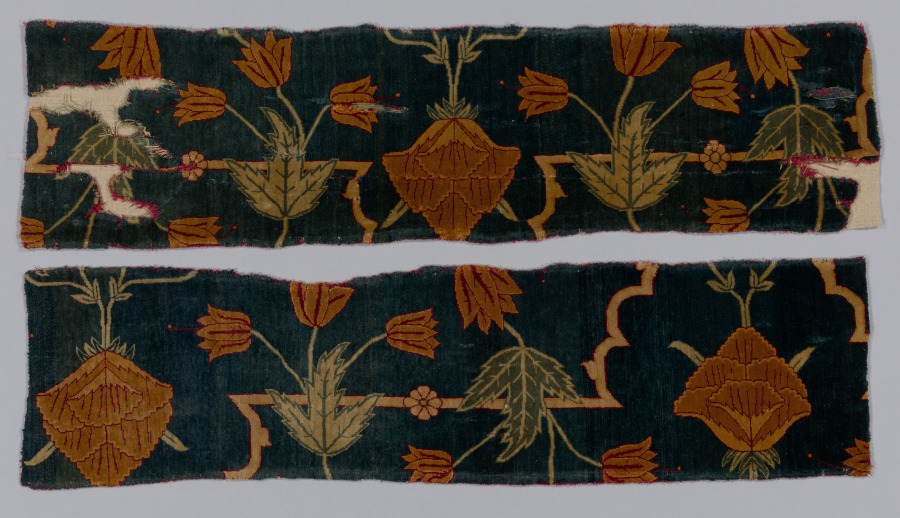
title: Fragments of a Carpet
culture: India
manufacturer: Imperial Manufactory (Indian)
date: 1600–1650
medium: silk and wool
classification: Carpet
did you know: These fragments have a formal floral and palmette design within a trellis pattern.